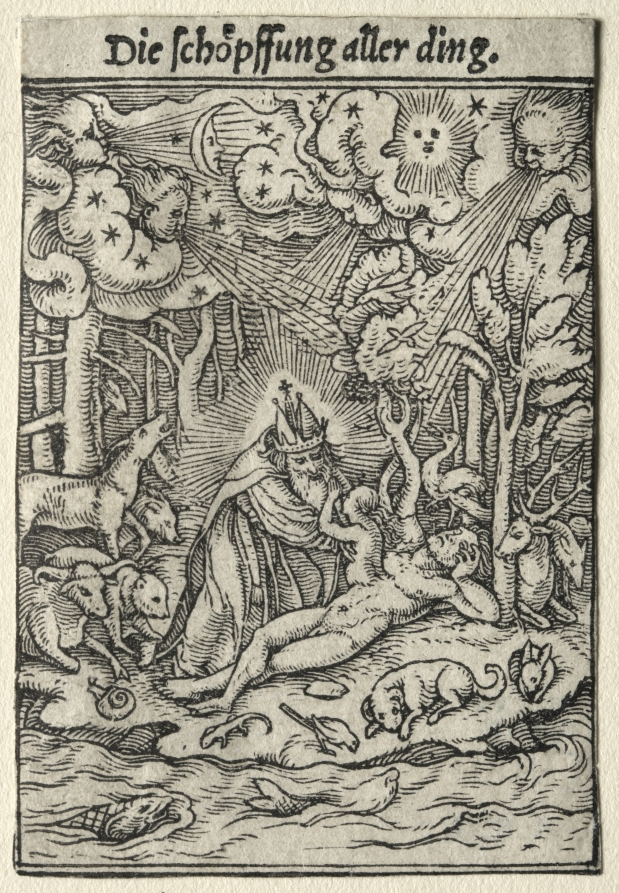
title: The Creation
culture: Germany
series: Dance of Death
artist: Hans Holbein the Younger (German, active England and Switzerland, 1497/98–1543)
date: c. 1526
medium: woodcut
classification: Print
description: Hans Holbein’s Dance of Death series, a collection of 41 prints, begins with this scene of the sixth day of Creation, when, according to Genesis, humankind was made. Here, a menagerie of animals crowd around in awe as God stoops to pull Eve from Adam’s side. From above, the moon, sun, and winds witness the birth. Eve is figured in this print as a fully formed, adult woman, though, much like the tree limbs behind her, she branches off from her partner, suggesting her origin from Adam’s rib. The pair is unaware of their nakedness, a sign of humanity’s then sinless state.